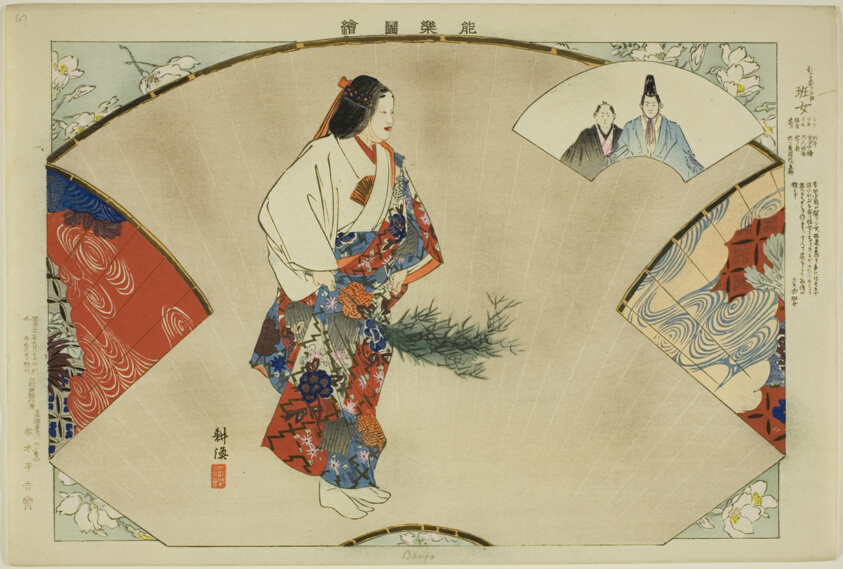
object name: Print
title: Banjo, from the series "Pictures of No Performances (Nogaku Zue)"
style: Japanese (culture or style)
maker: Tsukioka Kogyo; Japanese, 1869-1927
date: 1898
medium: Color woodblock print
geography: Japan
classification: woodblock print; print; asian art